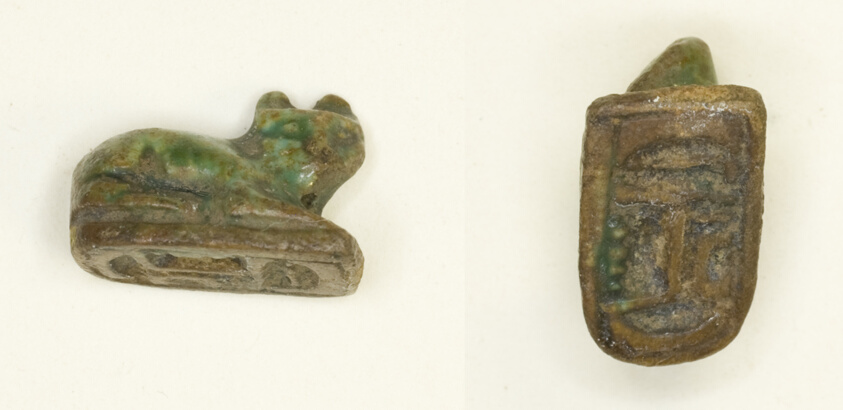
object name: Costume and Accessories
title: Scaraboid: Cat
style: new kingdom, egyptian, ancient, eighteenth dynasty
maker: Egyptian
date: New Kingdom, Dynasty 18 (about 1550–1295 BCE)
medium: Glazed steatite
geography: Egypt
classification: scaraboids; amulet; ancient art; seal; costume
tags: cats, Hieroglyphs